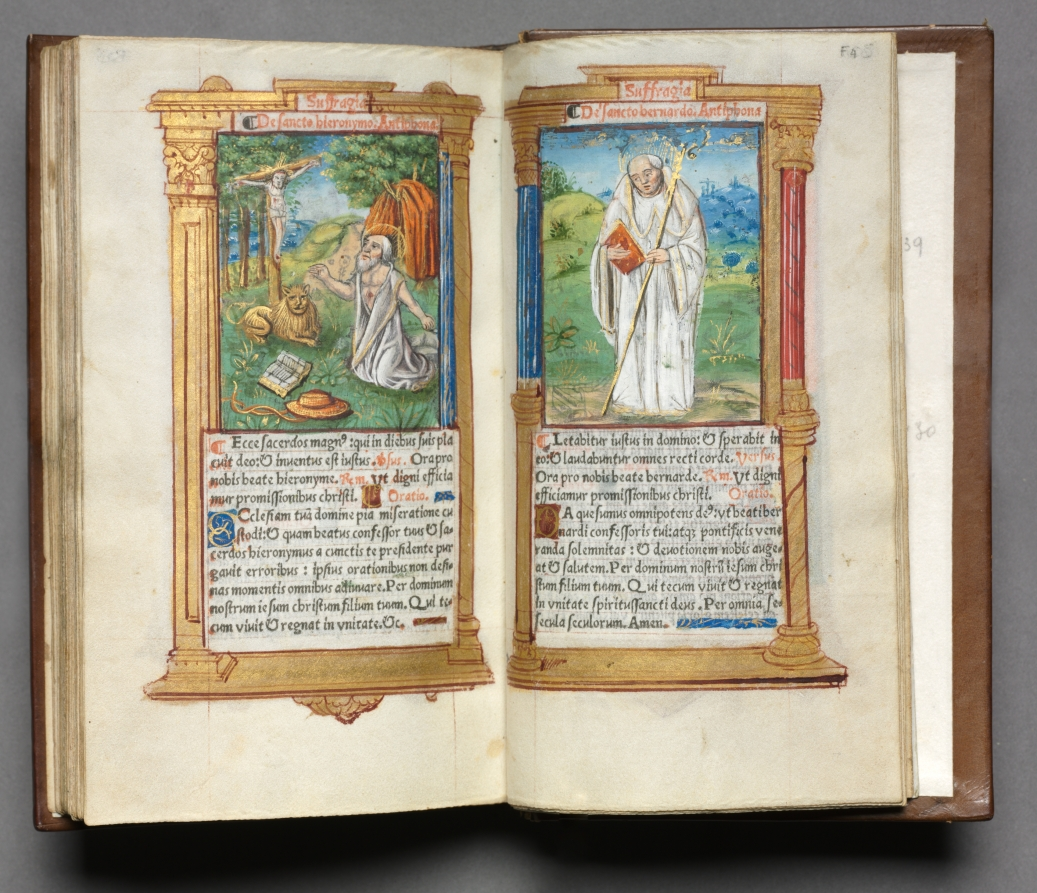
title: Printed Book of Hours (Use of Rome): fol. 108r, St. Bernard of Clairvaulx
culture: France, Paris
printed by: Guillaume Le Rouge (French, Paris, active 1493–1517)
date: 1510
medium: 112 Printed folios on parchment, bound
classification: Bound Volume